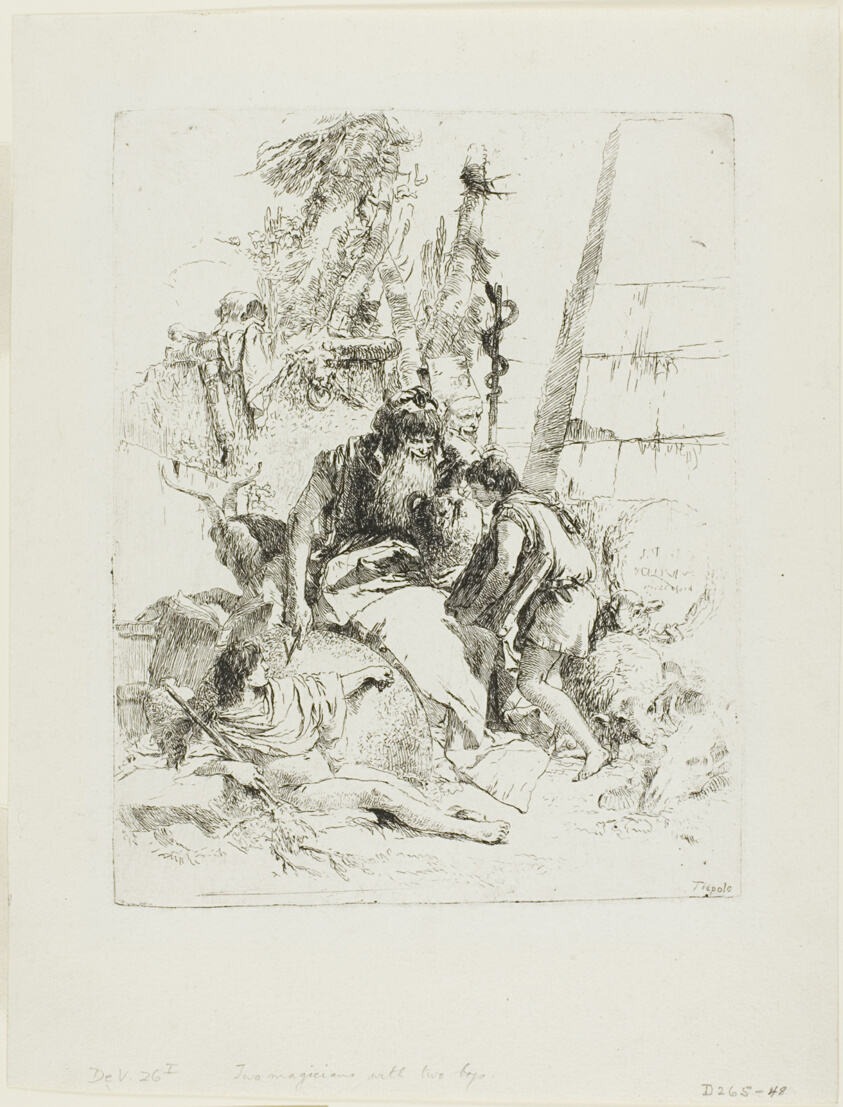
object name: Print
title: Two Magicians with Two Boys, from Scherzi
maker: Giovanni Battista Tiepolo (Italian, 1696–1770)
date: 1735–40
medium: Etching printed in black on paper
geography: Italy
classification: etching; print; prints and drawing